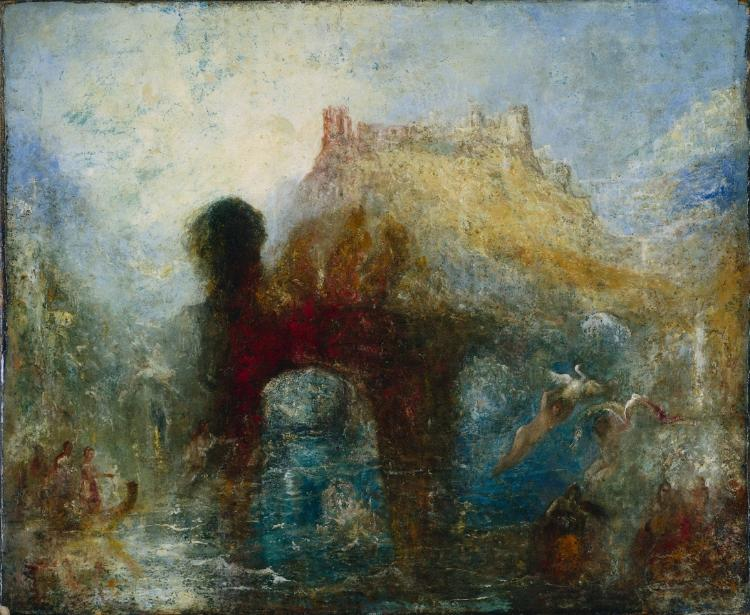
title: Queen Mab's Cave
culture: England, 19th century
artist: imitator of Joseph Mallord William Turner (British, 1775–1851)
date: after 1846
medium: oil on fabric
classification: Painting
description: This work is a reduced copy of a painting first exhibited by Turner at the British Institution in 1846 that passed, with the rest of his immense bequest to the nation, into the collections of the National Gallery and finally, in 1954, the Tate Gallery. Several lines from Shakespeare's A Midsummer Night's Dream and Turner's manuscript poem "Fallacies of Hope" were appended to the title in the British Institution catalogue, but they did little to explicate the nearly unintelligible concoction of fairies and Welsh ruins that make up this composition. Copies of Queen Mab's Cave by anonymous artists are abundant.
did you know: Queen Mab is a miniature fairy from English folklore who inspires dreams and plays pranks on people during the night. Shakespeare refers to her in both Romeo and Juliet and A Midsummer Night’s Dream,